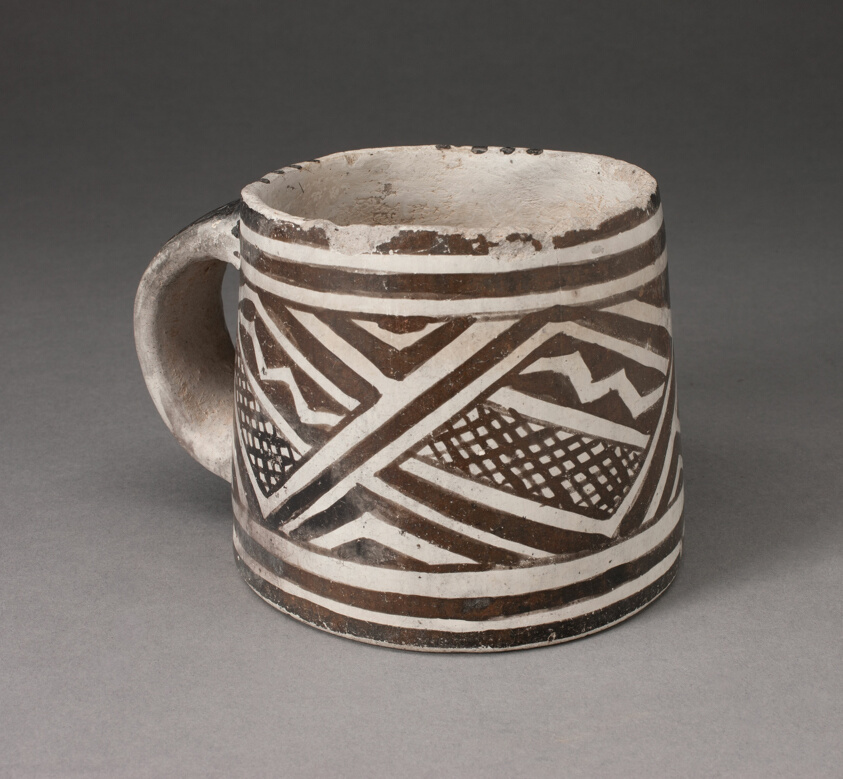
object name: Vessel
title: Mug with Interlocking Geometric Pattern with Zigzag Motifs and Crosshatching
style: ancestral pueblo (anasazi), anasazi, Pre-Columbian, americas, southwest, pueblo, Arts of the Americas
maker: Ancestral Pueblo (Anasazi), Mesa Verde Black-on-white; Southern Colorado, United States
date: 1100–1275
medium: Ceramic and pigment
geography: Southwest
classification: earthenware; ceramics; vessel; art of the americas